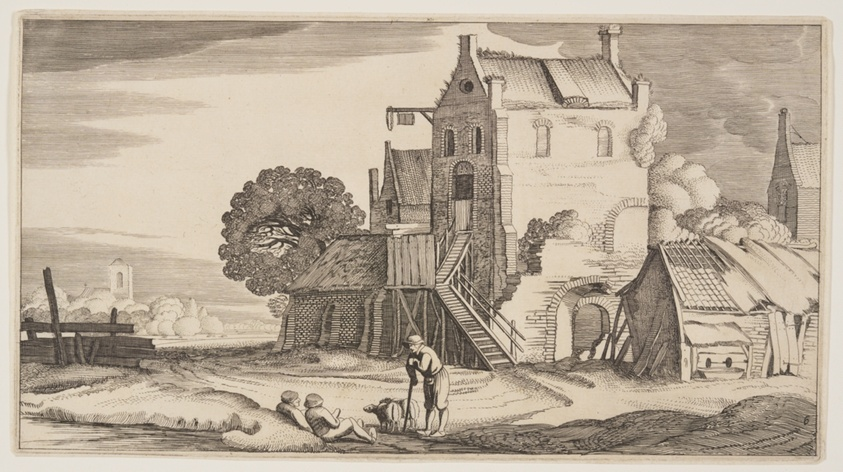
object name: Print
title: Three Figures in Conversation Near an Inn, from Landscapes (Playsante Lantschappen)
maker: Attributed to Claes Jansz. Visscher II (Dutch, 1586-1652); after Jan van de Velde II (Dutch, c. 1593-1641)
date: c. 1641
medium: Etching, with engraving, on ivory laid paper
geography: Netherlands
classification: etching; paper; print; prints and drawing